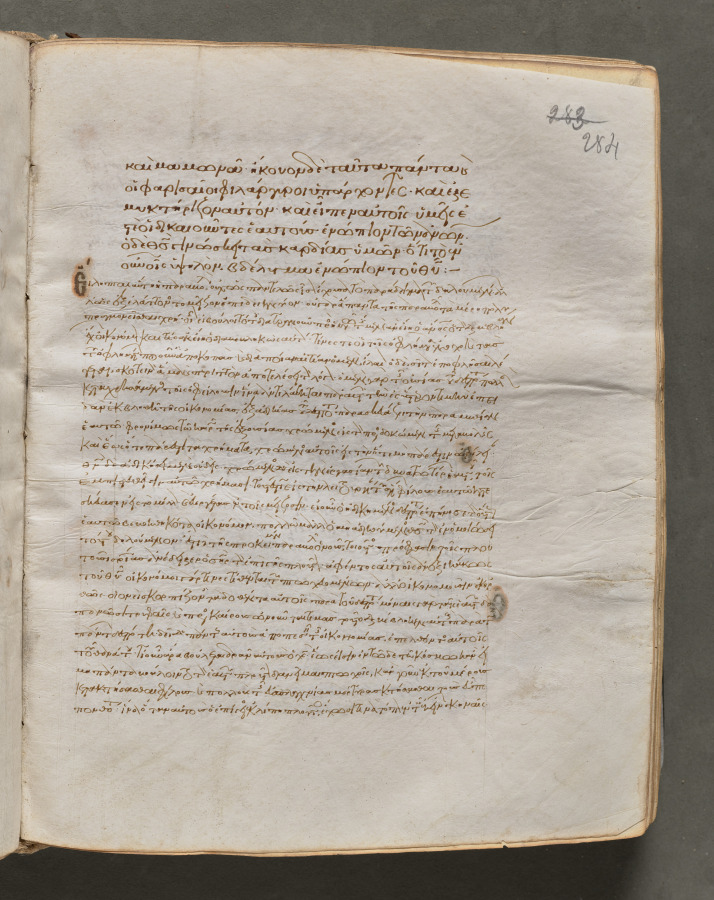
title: Text, folio 284 (recto), from a Gospel Book with Commentaries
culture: Byzantium, Constantinople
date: c. 1000–1100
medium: ink, tempera, and gold on vellum; leather binding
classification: Bound Volume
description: Each of the four gospels in this book opens on a page with brilliantly illuminated borders depicting the author of the text as well as birds—principally peacocks, symbols of the immortality of the soul—and fountains, representing the fountain of life and the salvation of the soul. This volume consists of 428 leaves with texts in Greek. Its level of sophistication suggests that it was probably written and decorated in a monastery in Constantinople.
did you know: Gospel books were carried in procession through Byzantine churches.